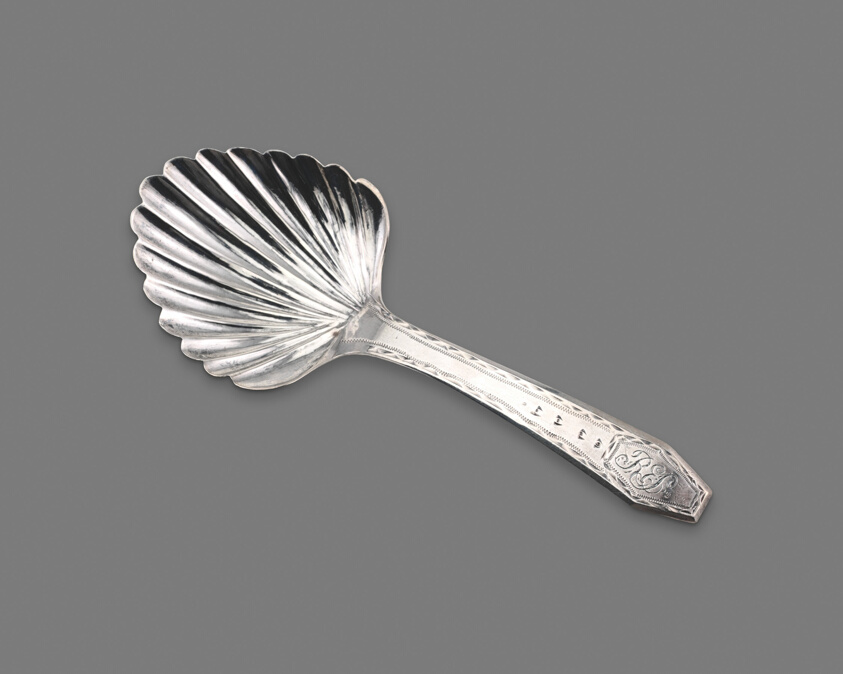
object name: Metalwork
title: Tea Caddy Spoon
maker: Robert Shepherd; American, 1781–1853; Albany, NY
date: 1805–6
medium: Silver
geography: Albany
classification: spoon; utensil; silver; american decorative arts; american arts; decorative arts